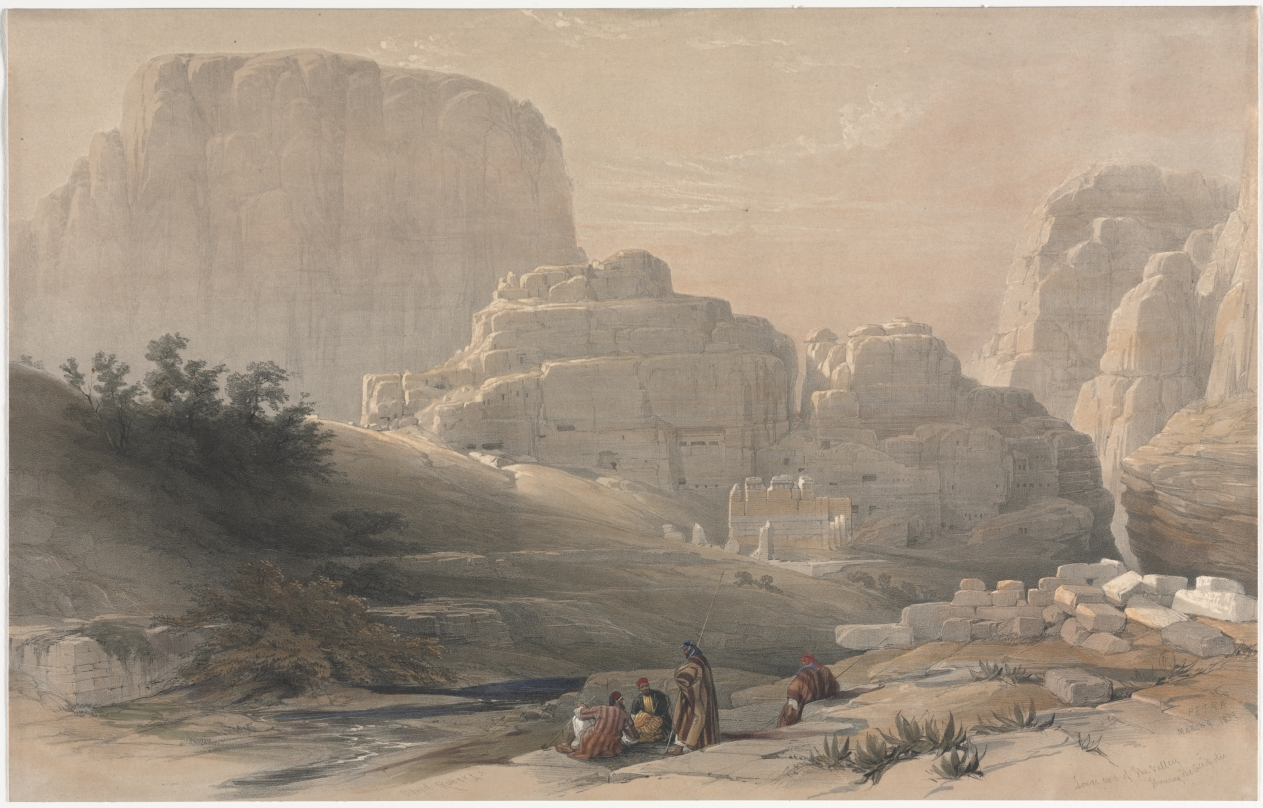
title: Petra, Lower End of the Valley, Viewing the Acropolis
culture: England, 19th century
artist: David Roberts (Scottish, 1796–1864)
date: 1839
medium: color lithograph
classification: Print